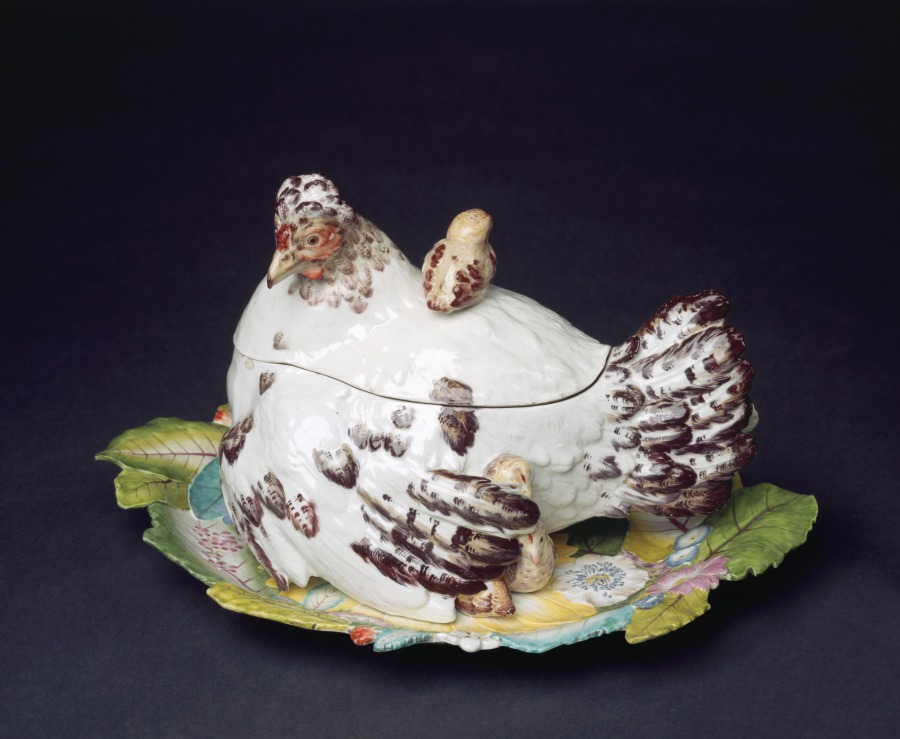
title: Stand for a Hen and Chicks Tureen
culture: England, London, Chelsea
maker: Chelsea Porcelain Factory (Britain, London, 1745–84)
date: c. 1755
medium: soft-paste porcelain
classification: Ceramic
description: The ceramic factory at Chelsea, located along the river Thames in western London, was Britain’s most renowned factory of decorative porcelain in the mid-1700s. Large tureens in the form of chickens or rabbits appealed to wealthy aristocrats, who took great care in developing specimen animal and poultry breeds on their country estates. The design for this particular tureen was taken from a popular seventeenth-century print by Francis Barlow depicting a farmyard.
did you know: See cover record for Hen and Chicks Covered Tureen (1984.58).